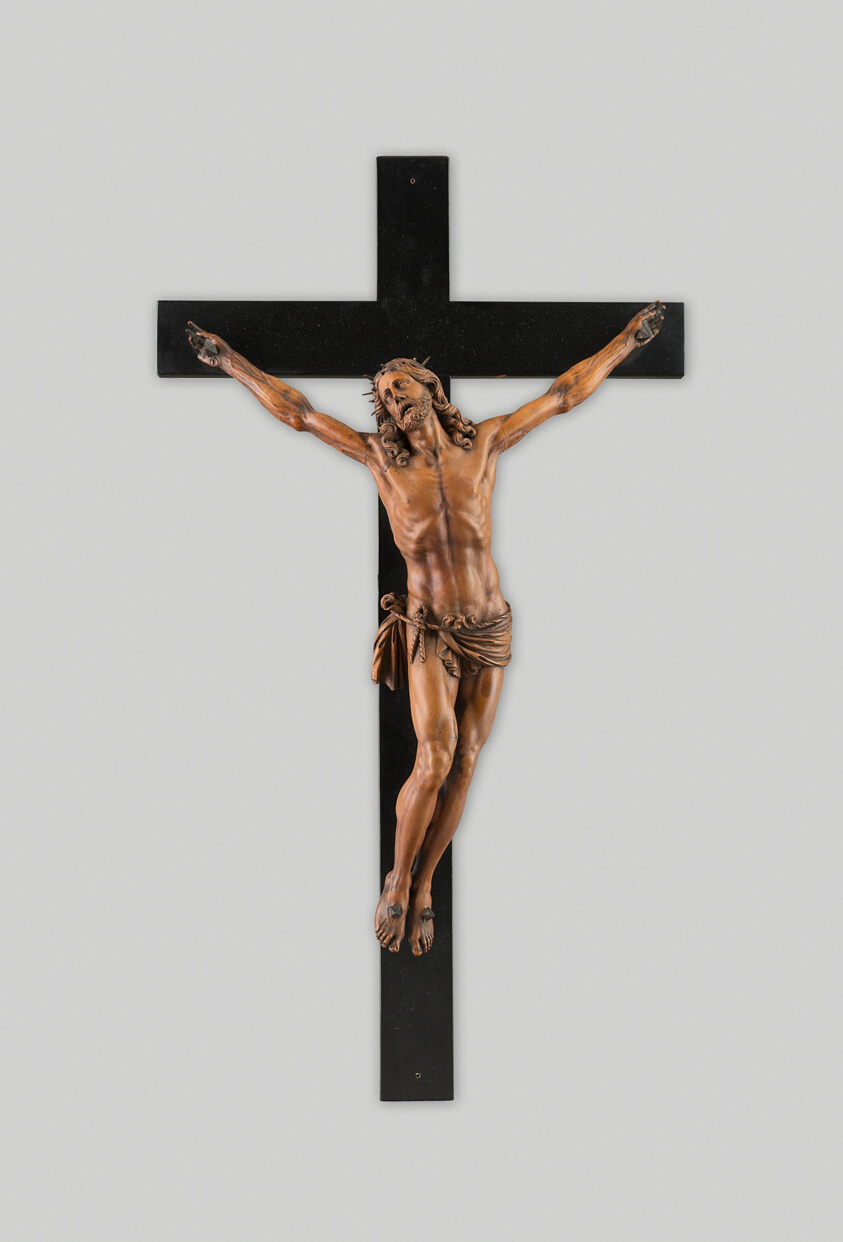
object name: Sculpture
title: Christ on the Cross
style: 17th Century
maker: Flemish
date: c. 1650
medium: Boxwood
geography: Flanders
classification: statuette; sculpture; flemish; sculpture/wood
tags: crucifixions, Christian subjects, Christianity, Jesus, man, religion, religious, religious figures